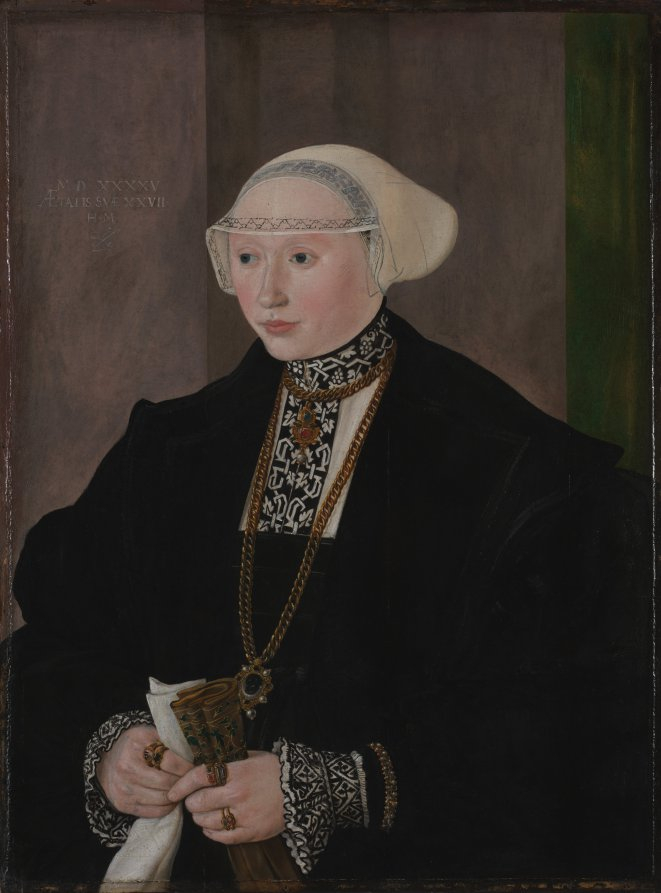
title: Portrait of Maria Kitscher, Frau von Freyberg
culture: Germany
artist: Hans Mielich (German, 1516–1573)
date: 1545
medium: oil on wood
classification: Painting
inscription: Signed upper left: "M.D. XXXXV. / AETATIS SUAE XXVII. / .H.M."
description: Maria von Freyberg was in the court of Albert V, Duke of Bavaria. However, as Lutherans, the family eventually fell from favor as Catholic political interests consolidated power in Bavaria. Mielich’s work for the Munich court included illustrating an inventory of the duchess’s jewelry, seen in the meticulous attention here to the sitter’s brooches, necklaces, and rings. The diamond and ruby ring on her left index finger would have slid apart to reveal a private message or image underneath the gems.